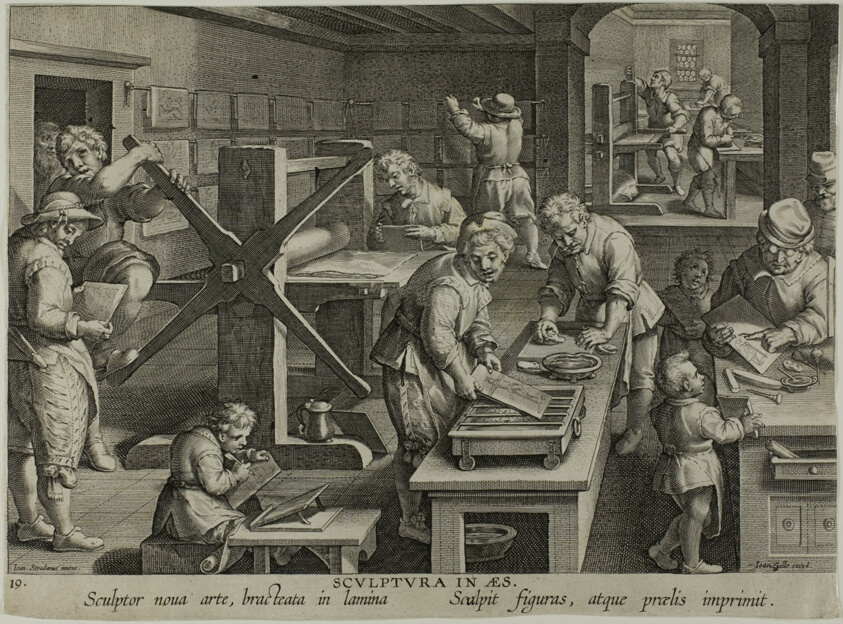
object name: Print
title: The Invention of Copper Engraving, from Nova Reperta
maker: Theodor Galle (Flemish, 1571-1633); after Joannes Stradanus (Flemish, 1523-1605)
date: c. 1591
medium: Engraving in black on ivory laid paper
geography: Flanders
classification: engraving; paper; print; prints and drawing